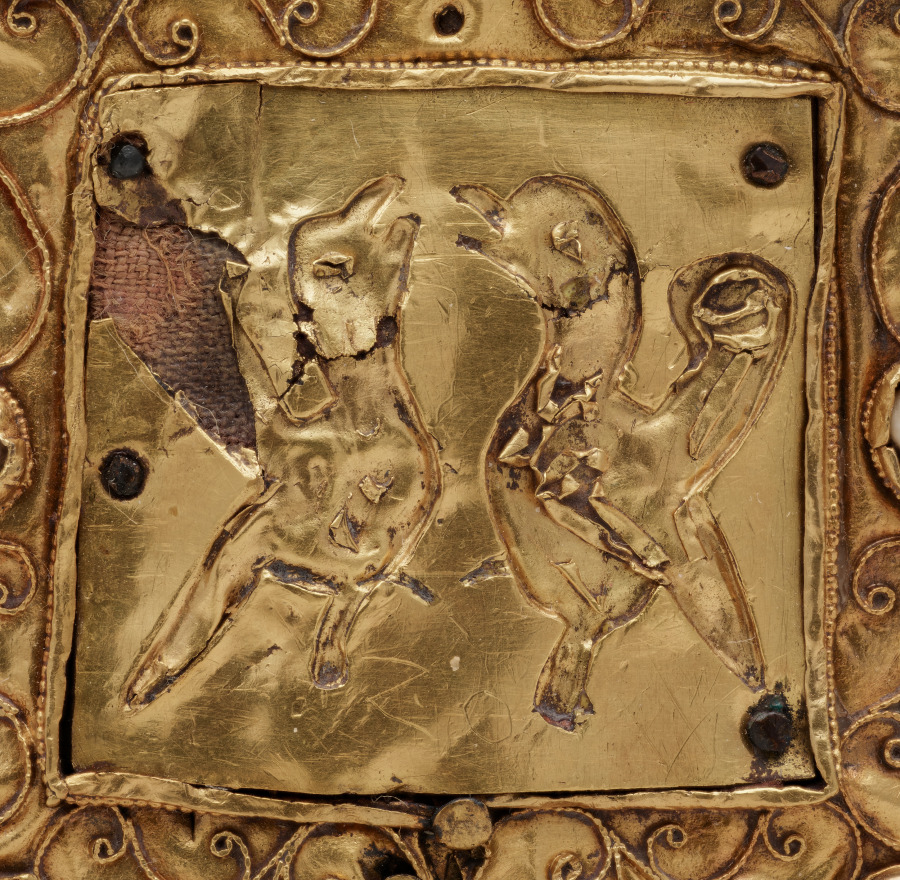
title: Ceremonial Cross of Count Liudolf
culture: Germany, Lower Saxony?, Romanesque period, 11th century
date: shortly after 1038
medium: gold: worked in repoussé; cloisonné enamel; intaglio gems; pearls; wood core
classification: Metalwork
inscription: translation of the inscription on back: Relics of the Holy Bishop Valerius, of the Holy Martyr Pancratius, of the Stone which was laid on the tomb of the Lord. This Gertrude had made for the spiritual welfare of Count Liudolf.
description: This precious gold cross was commissioned by Countess Gertrude (died 1077) and given to the church of Saint Blaise following the death of her husband, Count Liudolf of Brunswick (died 1038). The cross is decorated with a large oval-shaped chalcedony at its center and with slightly smaller rock crystals at its terminal ends. Fine but fragmentary cloisonné enamel plaques with pairs of confronting peacocks, symbols of immortality, appear at the center of each cross arms. They are set within an intricate system of filigree wire decoration imitating tendrils. Numerous pearls, three large intaglio gems, and various precious and semiprecious stones complete the decoration of the cross. Concealed behind the enamel plaque on the upper cross arm are relics of Saints Valerius and Pancratius as well as a fragment from the stone that sealed the Sepulcher of the Lord. The back of this cross is very worn, making it difficult to recognize the main features of its repoussé decoration. Faintly visible at the center is the Lamb of God, a symbol of Christ, with a cross-shaped halo. Depicted at the end of the cross arms are the symbols of the four Evangelists. A Latin inscription above the Lamb of God identifies the relics concealed behind it, namely "relics of the saintly bishop Valerius, of Pancratius martyr, [and] of the stone that was placed above the tomb of the Lord." A second inscription below states, "This [work] was commissioned by Gertrude for the soul of Count Liudolf," revealing the identity of the cross's patron and the approximate date of its commission.